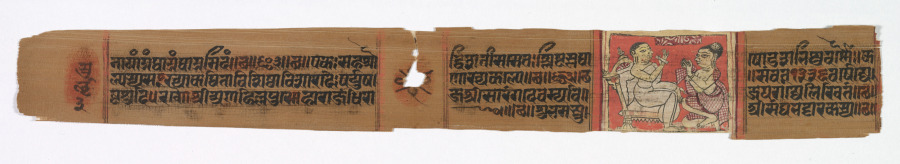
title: Monk Teaching Lay Disciple: Colophon page from a Kalpa-sutra and Story of Kalakacharya of Devachandra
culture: Western India, Gujarat, Patan (Anahillapura), reign of King Sarangadeva of the Vaghela dynasty (1275-1297)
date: 1279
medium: Gum tempera and ink on palm leaf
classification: Painting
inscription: Sri Anahillapure Maharajadhiraja Sri Sarangadevasya Vijayarajye Likhitam on the fifth day of the bright half of Jyestha, Samvat 1336" (AD1279)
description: Before the use of paper, Indian books were written on palm leaves, bound by a string passed through the hole in the middle of the pages, which were turned horizontally. Often the paintings do not reference the story of the text because they may have functioned as adornments rather than illustrations. Virtuous scenes, such as a layman venerating a Jain monk, as seen on this page, were apparently thought to beautify a sacred text and made it more costly and visually appealing. By adding painted adornments, a donor can accrue greater religious merit.